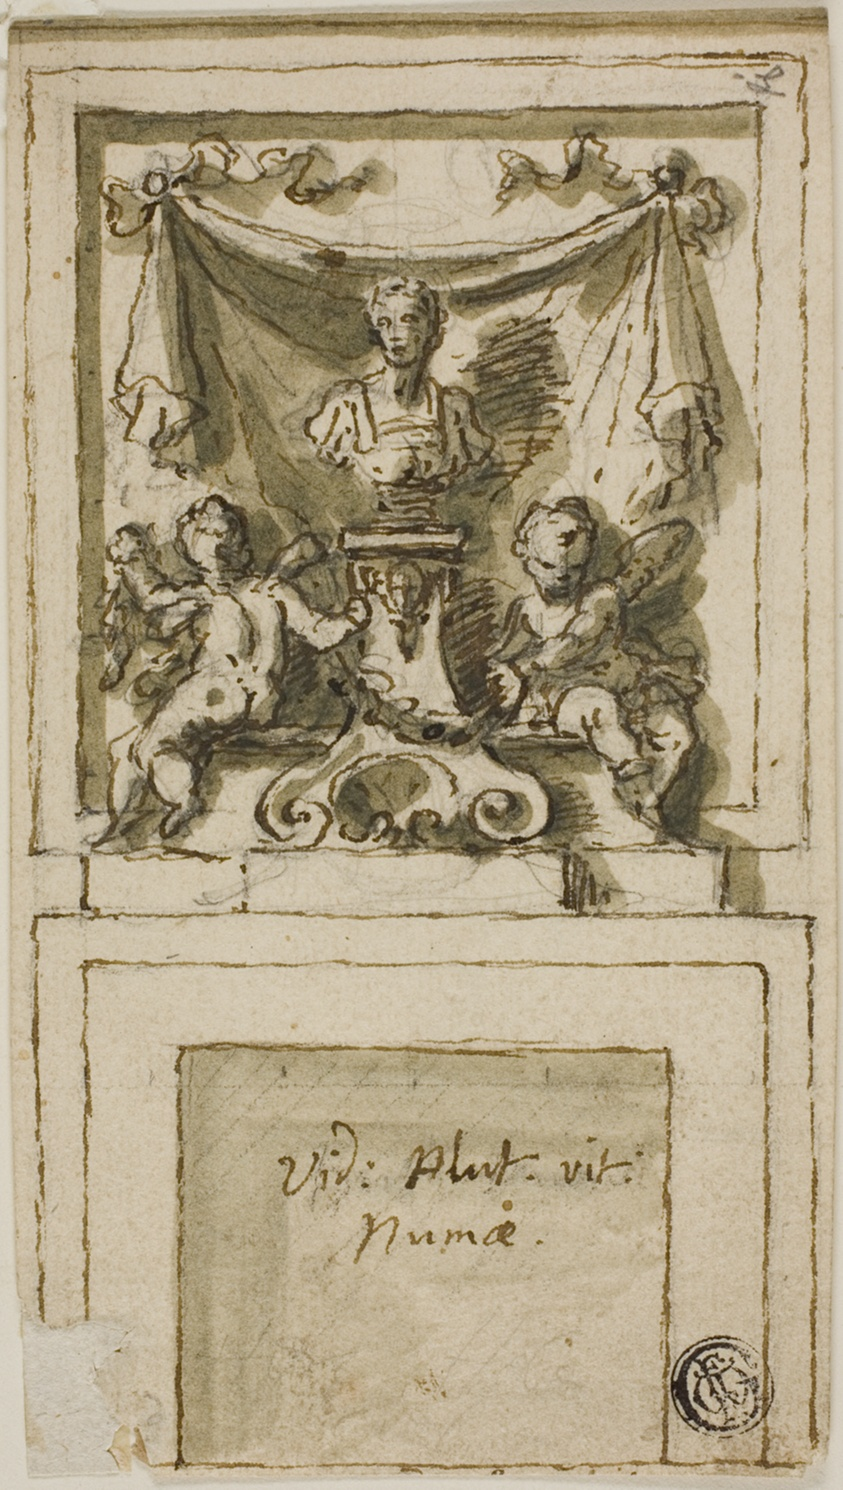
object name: Drawing and Watercolor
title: Design for the Overmantel of a Chimneypiece with Bust of Pompilius Numa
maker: James Thornhill (English, 1675-1734)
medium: Pen and brown ink with brush and green wash, over graphite, on ivory laid paper, tipped onto ivory wove paper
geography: England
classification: pen and ink drawings; drawings (visual works); prints and drawing